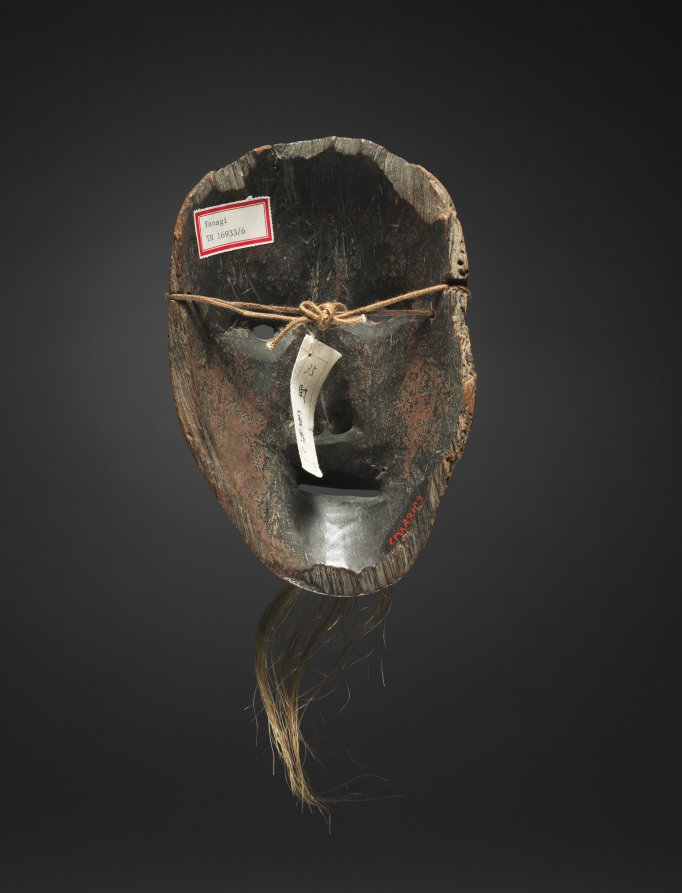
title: Mask of an Elder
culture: Korea, Joseon dynasty (1392–1910)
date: 1800s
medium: wood with horsehair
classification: Wood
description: The traditional Korean mask dance is a form of drama featuring the wearing of masks such as this one, singing and dancing. It was originally a regional term only applied to mask dances traditional to Hwanghae Province. During the Joseon dynasty (1392–1910), the dance rose to popularity among villagers as a means of self-expression and liberation, often criticizing injustice of society. Talchum: The Traditional Mask Dance of South Korea South Korea offers a vast array of experiences that are both dynamic and reverent to its rich ancient heritage. With 5,000 years of fascinating history and culture, we offer you the opportunity to encounter Talchum, a traditional mask dance-drama that captures the essence of its Shamanic beliefs in various regions throughout centuries.﻿ ﻿ Talchum is a traditional Korean mask dance drama. Literally translated to “mask dance,” it displays the people’s close connection with village communities, which had long been the basis of Korean culture and tradition. ﻿ ﻿ Talchum was derived from Shamanic rituals to pray for abundant harvest, peace, prosperity, and protection against evil spirits. As civilization developed, masks gradually evolved from sacred objects used in shamanism to becoming forms of entertainment and expression.In the Joseon period (1392–1910), the dance rose to popularity among villagers as a means of self-expression and liberation. Talchum signified the spirit of the oppressed through dance. These masked performances told stories that criticized an unjust society or ruling class, and expressed the people’s desire for a reformed world. The main themes of Talchum include, first, a ritual to drive away evil spirits; second, ridicule of apostate Buddhist monks; third, insult the hypocrisy of noblemen; and fourth, tragedy arising from conflict among spouses and the joys or sorrows of everyday life.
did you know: This wooden mask may have been worn by a dancer who performed an elderly figure for outdoor theatrical dance.